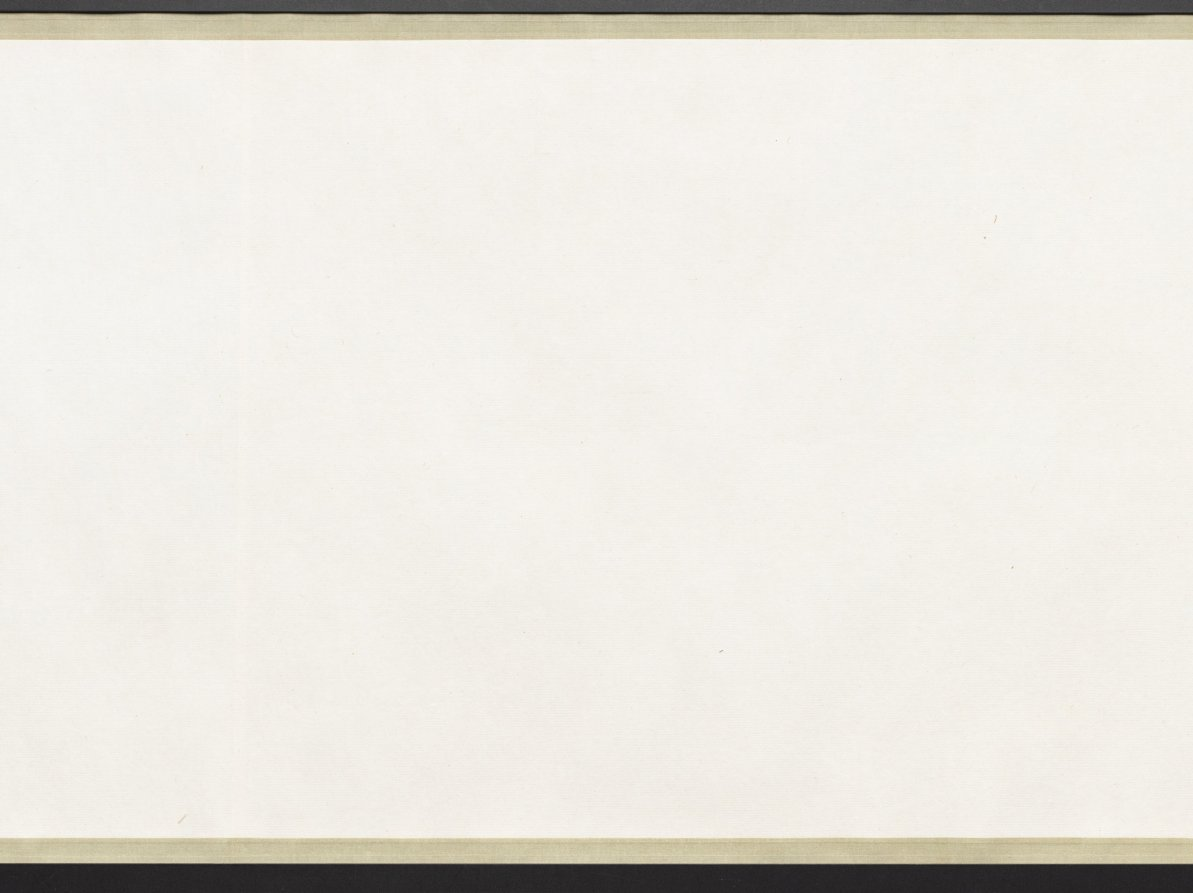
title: A Hundred Sparrows in a Lofty Grove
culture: China, Ming dynasty (1368–1644)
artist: attributed to Lin Liang (Chinese, 1416–1480)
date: 1368–1644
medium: handscroll; ink on silk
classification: Painting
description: Sparrows engaged in all kinds of activities frolic amid leafy branches, blades of grass, rocks, and a waterfall. As our eyes move over the scroll, the artist engages us in enjoying the sparrows’ carefree movements in a natural setting. The charming birds were painted from close observation in swift and fluent brushstrokes. Sparrows are a common bird and in Chinese painting they often represent the commoner in human society as opposed to the noble pheasant or peacock representative of the ruling class.